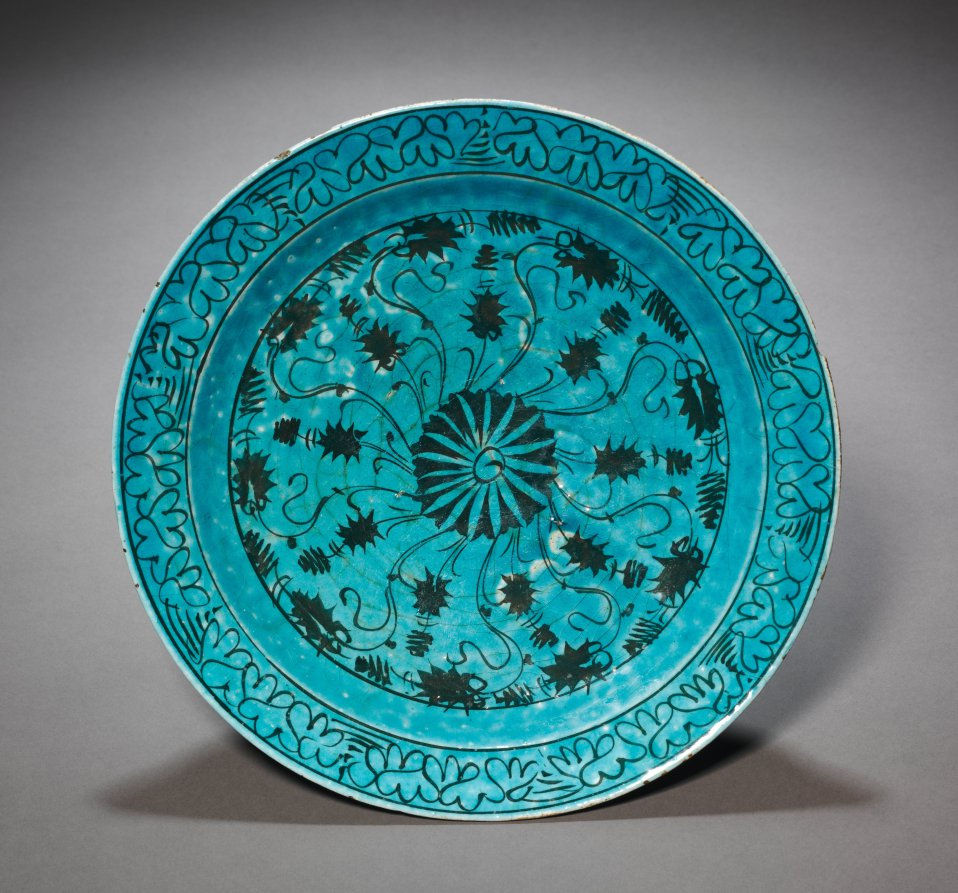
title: Dish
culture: Caucasus or northern Iran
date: c. 1600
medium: Fritware with underglaze design in black slip, Kubachi ware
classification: Ceramic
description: This type of pottery is named after a town in the Caucasus, a region between the Black and Caspian Seas that encompasses modern-day Azerbaijan, Armenia, Georgia, and parts of southern Russia, where many of these objects were found. However, it is likely that Kubachi wares were produced in northwestern Iran using fritware, a ceramic that incorporates large amounts of crushed quartz into white clay. The use of black slip to paint designs under a turquoise glaze is striking and highlights the free-flowing floral motif.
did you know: Because many of these vessels were found in peasant houses in the town of Kubachi in the Caucasus, the name "Kubachi" ware was given to the entire group.